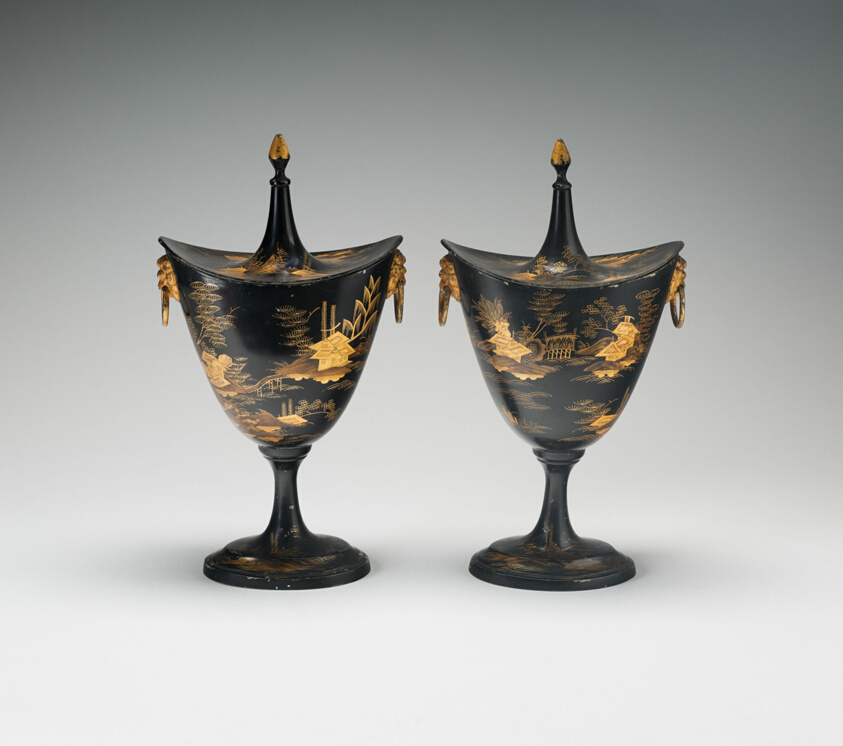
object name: Metalwork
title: Pair of Chestnut Urns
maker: Usk or Pontypool, Wales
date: 1790/1800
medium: Pewter, lacquered and gilded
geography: Wales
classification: pewter; metalwork; european decorative arts